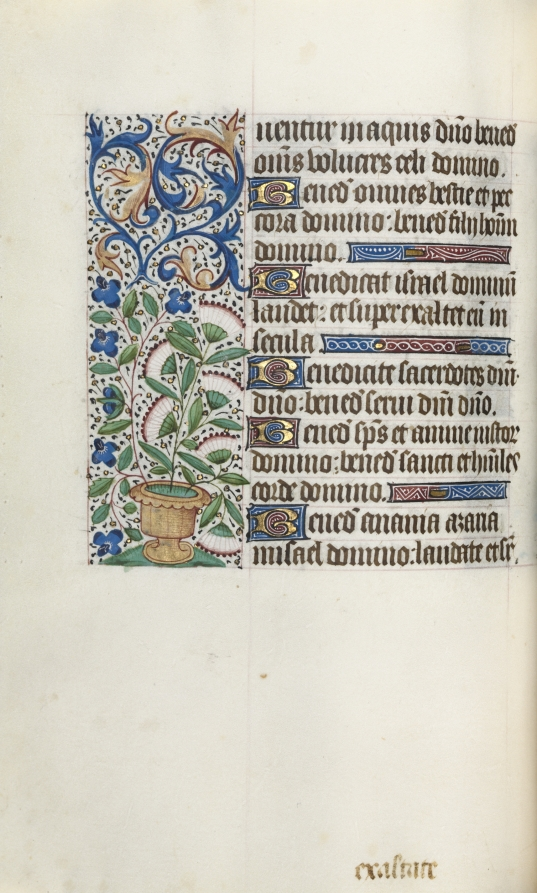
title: Book of Hours (Use of Rouen): fol. 43v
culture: France, Rouen, 15th century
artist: Master of the Geneva Latini (French, active Rouen, 1460–80)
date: c. 1470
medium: ink, tempera, and gold on vellum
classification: Bound Volume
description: In the late 1400s and early 1500s Rouen was an established and important center of book production. The city’s cathedral had a wealthy chapter that spent large sums of money to commission books and to maintain its extensive library. The stationers and booksellers would have likely been concentrated in or near the cathedral precinct. This artist, named after a manuscript now in Geneva, was Rouen’s principal illuminator during the second half of the 1400s.